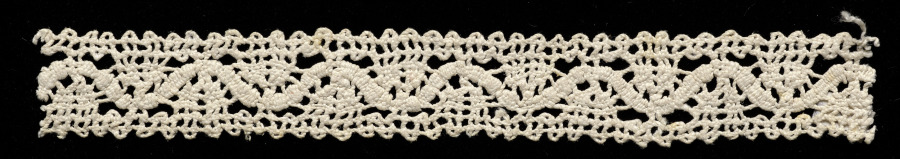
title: Lace Insertion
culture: Italy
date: 1600s–1700s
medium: Bobbin lace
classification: Lace